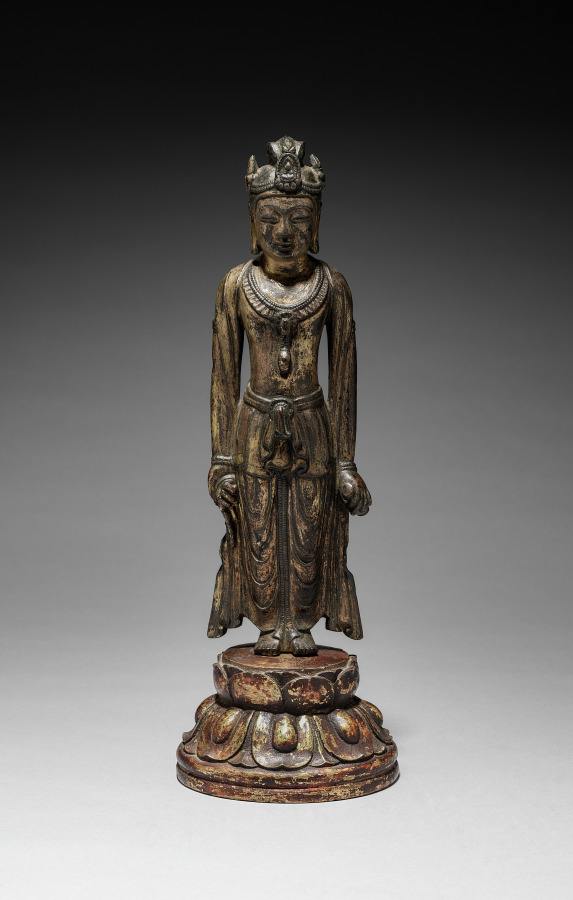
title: Kannon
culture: Japan, Asuka period (538–710)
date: mid-600s–early 700s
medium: gilt bronze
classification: Sculpture